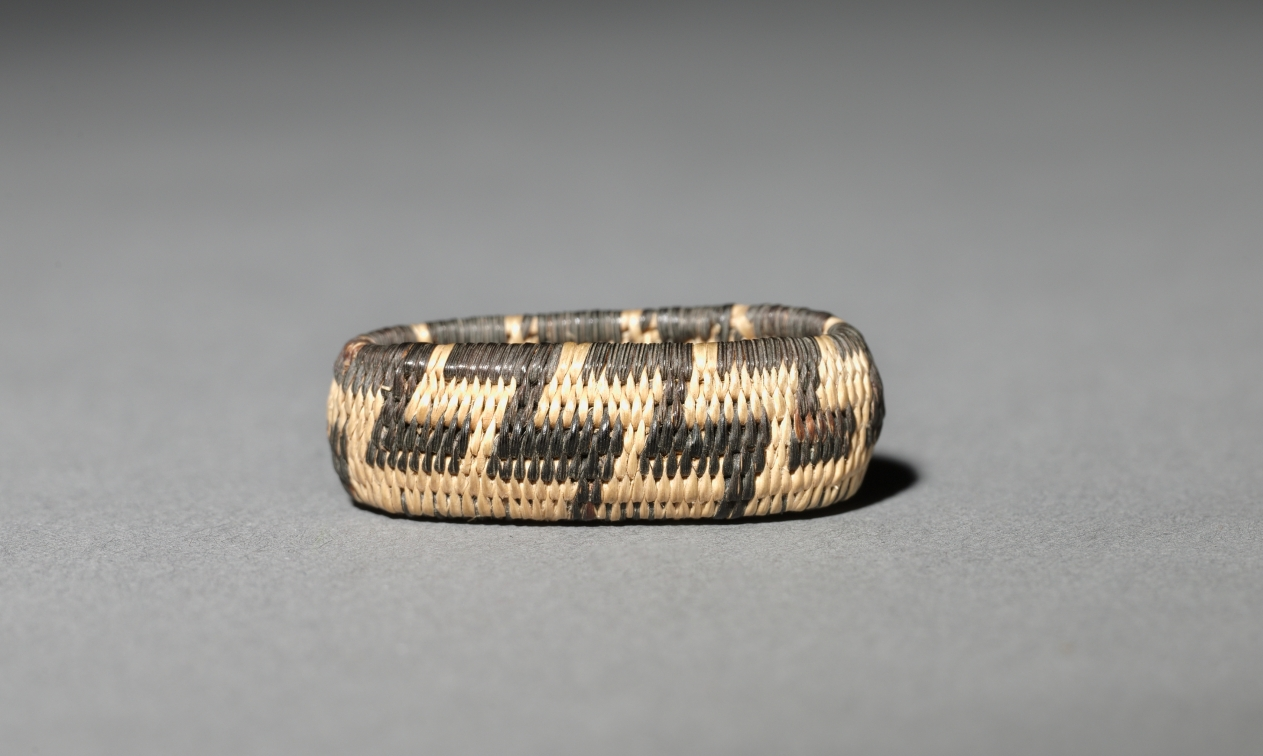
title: Miniature Rhomboidal Basket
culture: California, Pomo, late 19th-early 20th century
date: late 1800s-early 1900s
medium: plant materials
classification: Basketry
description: Miniature baskets were made to demonstrate the basket-maker’s virtuoso skill, and these tiny marvels seem to be no exception—the smallest are just a few millimeters wide but still patterned. For such fine work, dexterity was required as much for preparation of materials as for weaving.